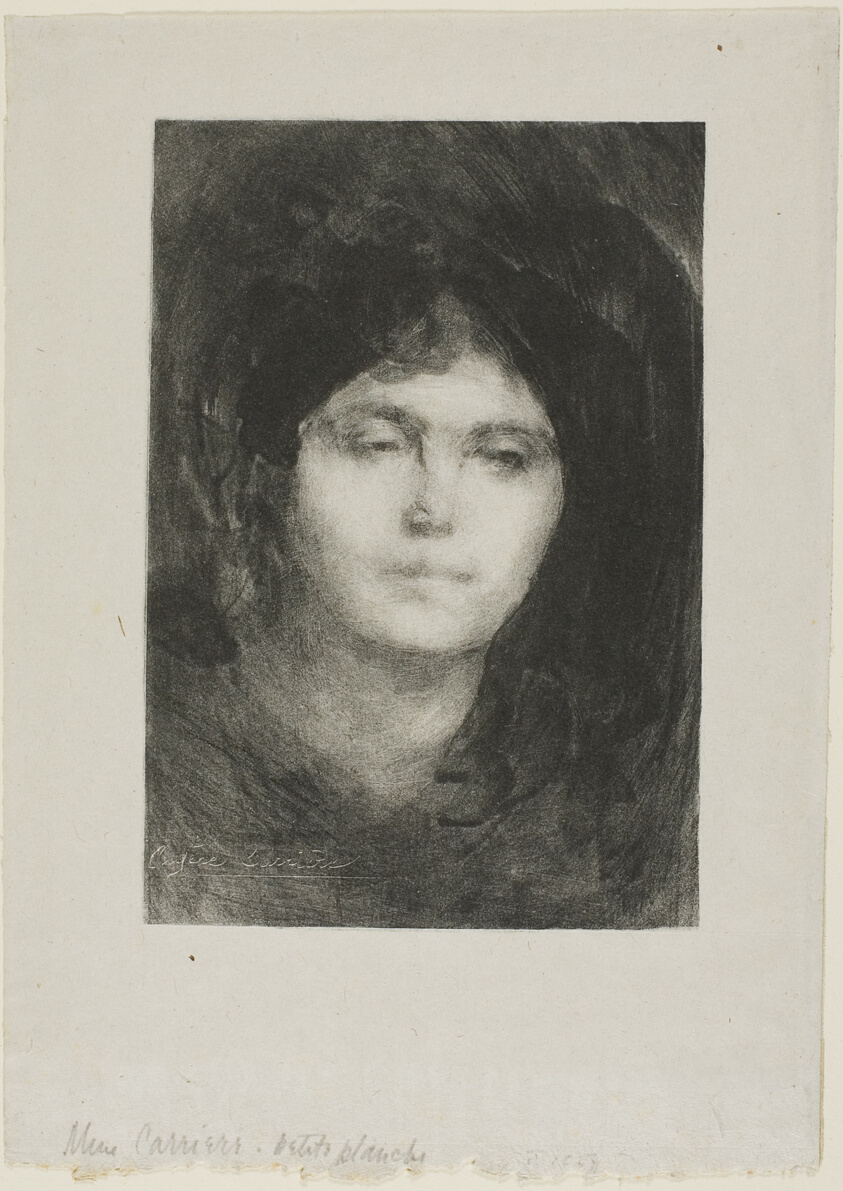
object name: Print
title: Madame Eugène Carrière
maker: Eugène Carrière (French, 1849-1906)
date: 1893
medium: Lithograph in black on light gray Japanese paper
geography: France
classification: lithograph; print; prints and drawing